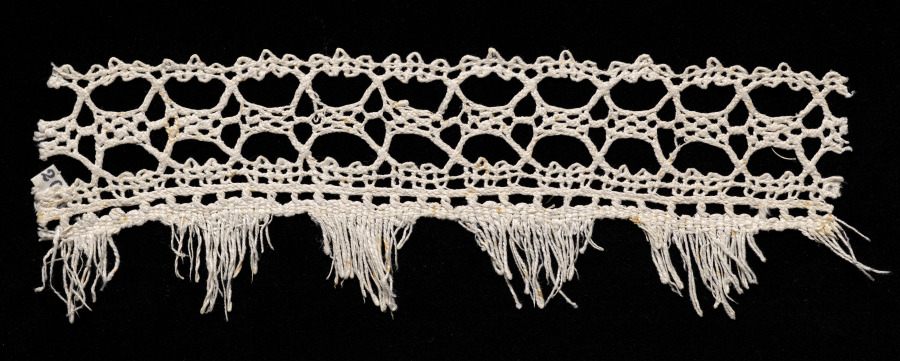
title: Lace Insertion with Fringe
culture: Italy, Venice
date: 1540–60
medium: Bobbin lace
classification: Lace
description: This lace fragment is the same design as 1920.996.